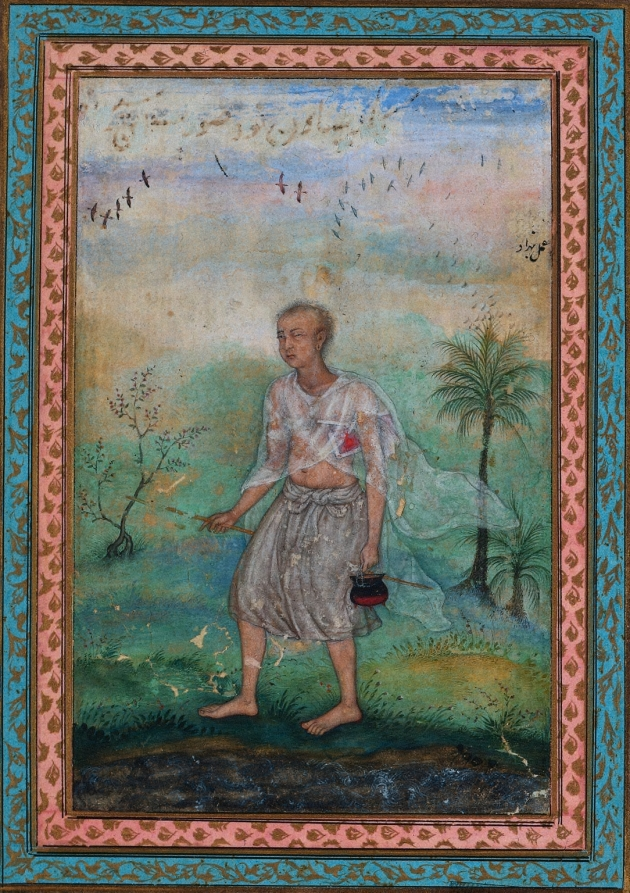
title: Jain Ascetic Walking Along a Riverbank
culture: Mughal India, court of Akbar (reigned 1556–1605)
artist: Basavana (Indian, active c. 1560–1600)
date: c. 1600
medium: gum tempera, ink, and gold on paper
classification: Painting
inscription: amal-i behzad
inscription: amal-i Basawan ... [?]chandra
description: Alluding to his wisdom, this white-clad Jain monk carries a manuscript under his left arm, bound with a red cover. Otherwise he carries a Jain monk’s basic accouterments: whisk broom, staff, and pot. This sensitively painted portrait was made for the collection of the Mughal emperor Akbar who was curious about the tenets of Jainism. He admired the explanations of the Jain monks who regularly attended the emperor’s weekly discussion sessions among members of different religious groups.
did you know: He carries a book and a fly whisk tucked under his left arm.